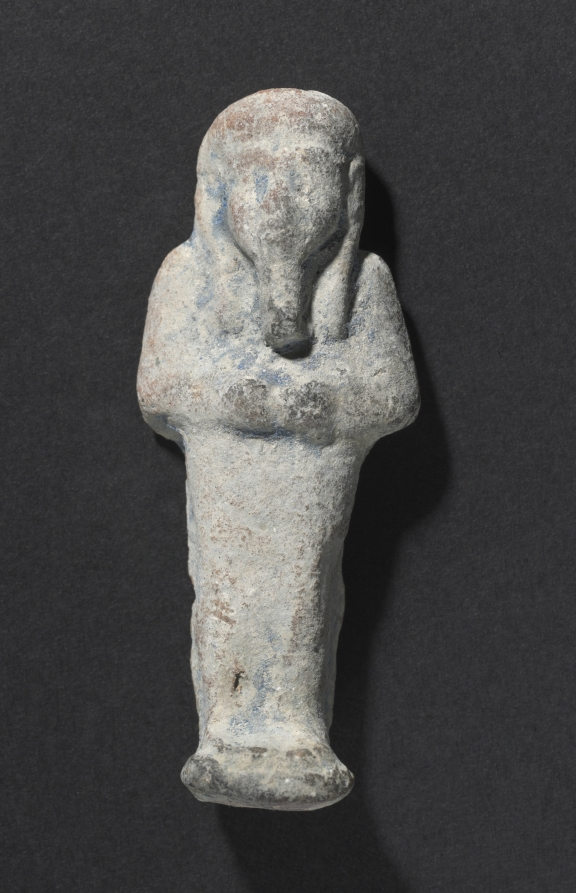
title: Shawabty of Ditamenpaankh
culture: Egypt, Late period (715–332 BCE), Dynasty 25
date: c. 715–656 BCE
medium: terracotta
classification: Funerary Equipment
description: High demand for shawabtys in the Late Period, a time when as many as 400 or more shawabtys were placed in the tomb with the deceased, gave rise to a specialized container for storing them: the shawabty box. This example is inscribed for the lady of the house, Ditamenpaankh, and was probably one of a pair originally made for her. The single-masted boat on the box's lid is perhaps an allusion to the pilgrimage of the deceased to the holy city of Abydos, the cult city of Osiris, king of the dead. The shawabtys inside are crude, mass-produced examples cast in an open mold. Made of terracotta, their blue paint imitates more costly shawabtys made of faience. As for the shawabty spell, it has been removed from its traditional location on the shawabty's front and relocated onto the sides of box, where it needed only to be written once, thus expediting production.